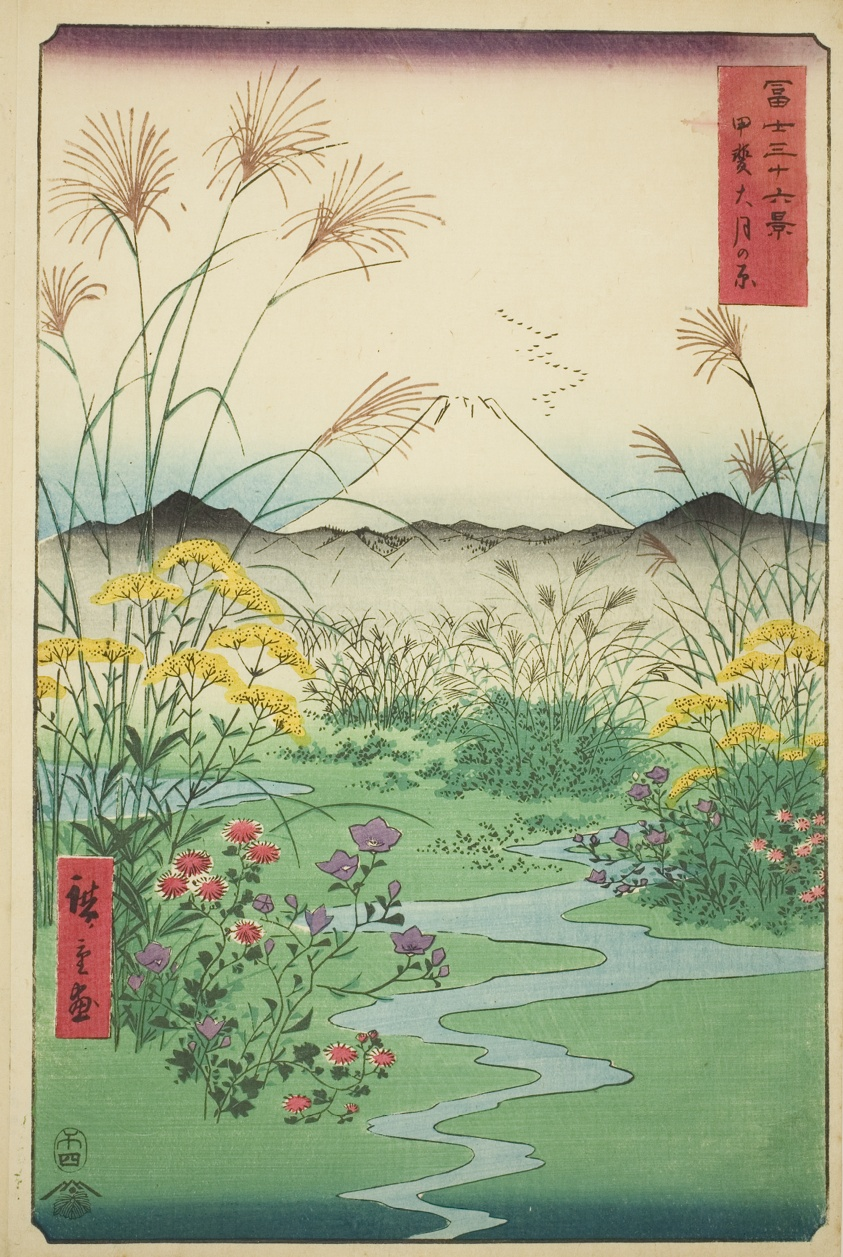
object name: Print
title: Otsuki Plain in Kai Province (Kai Otsuki no hara), from the series "Thirty-six Views of Mount Fuji (Fuji sanjurokkei)"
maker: Utagawa Hiroshige 歌川 広重; Japanese, 1797-1858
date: 1858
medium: Color woodblock print; oban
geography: Japan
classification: print; asian art